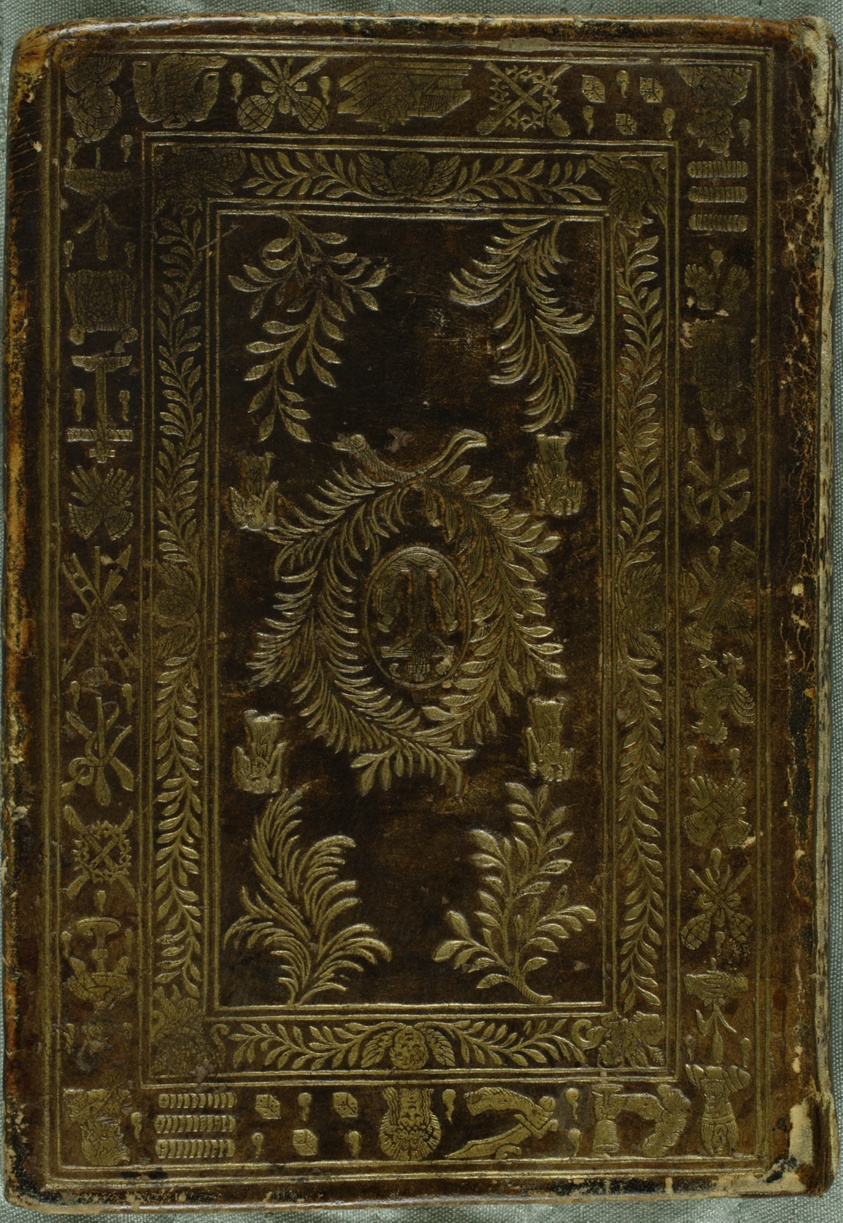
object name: Book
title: Horae Beatae Mariae Virginis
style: medieval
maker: French (possibly Besançon)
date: 1460 (binding 1580/90)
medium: Manuscript with 88 folios, 13 miniatures and other decorations in tempera and gold leaf, with Latin littera textualis inscriptions in brown black ink, ruled in red, on parchment bound in golden brown morocco, gold-tooled, over pasteboard, with gilt edges (semé) and laid paper end papers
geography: France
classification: manuscript; prints and drawing; book